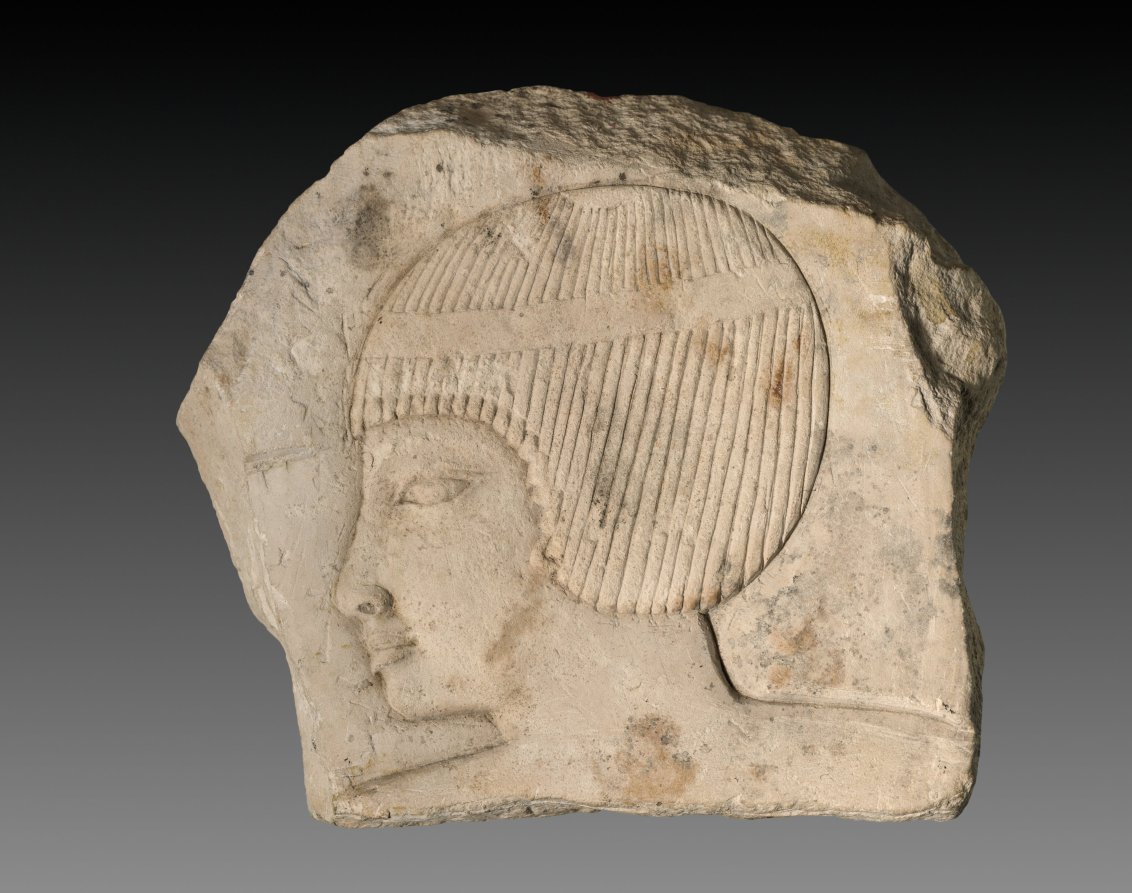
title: Fragment of Relief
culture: Egypt, Modern forgery (?)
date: INVALID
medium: limestone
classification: Sculpture